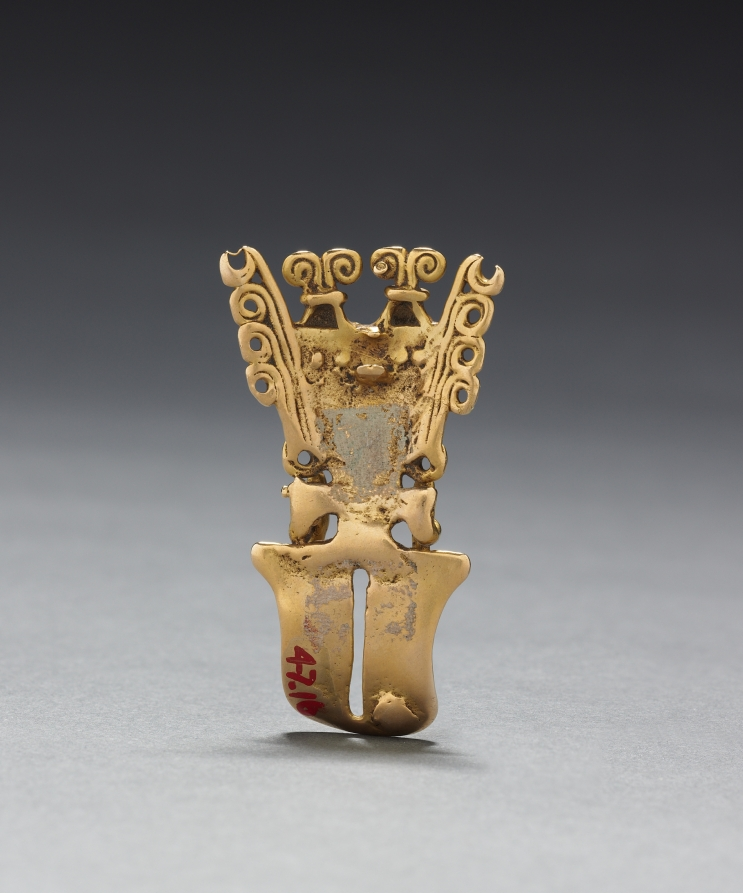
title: Figurine Pendant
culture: Colombia, Quimbaya or Yotoco style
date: c. 400–1000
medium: cast gold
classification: Metalwork